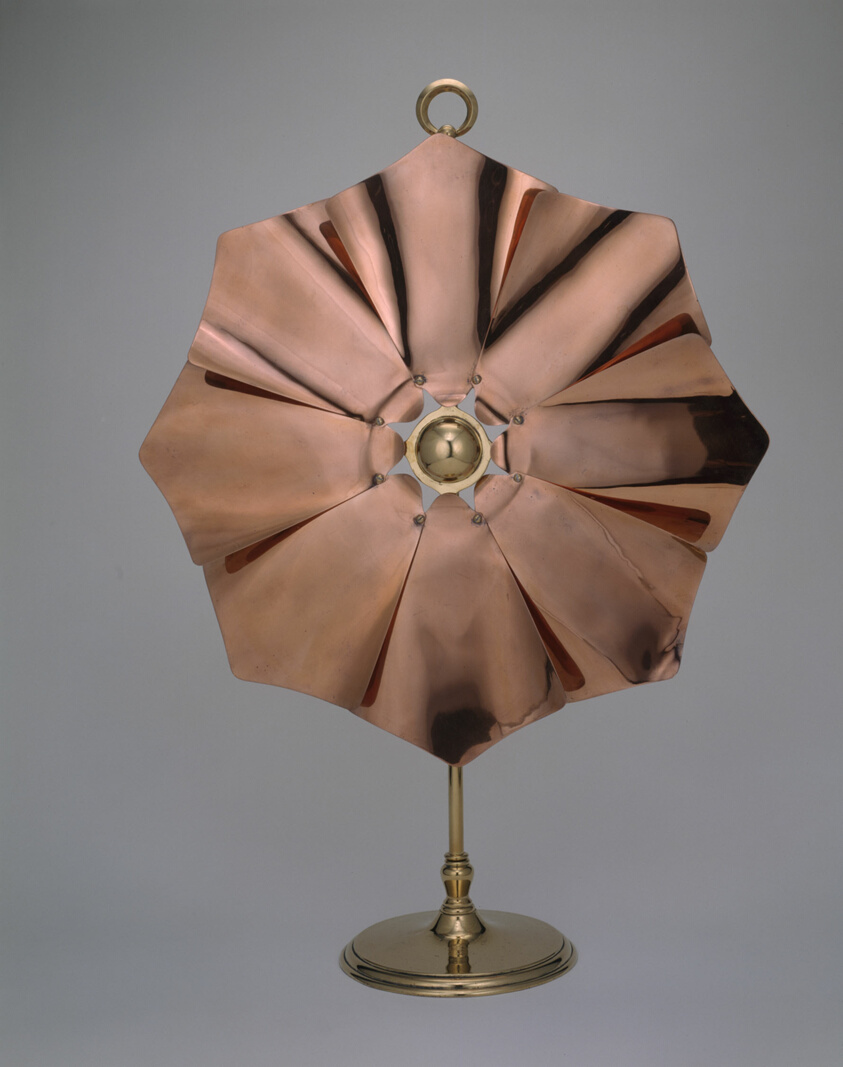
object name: Metalwork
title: Fire Screen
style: Arts and Crafts Movement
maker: Designed by William Arthur Smith Benson (English, 1854-1924); Manufactured by W. A .S. Benson & Co. (English, 1880-1920); England, London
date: c. 1900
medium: Copper and brass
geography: England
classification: fireplace equipment; european decorative arts; metalwork